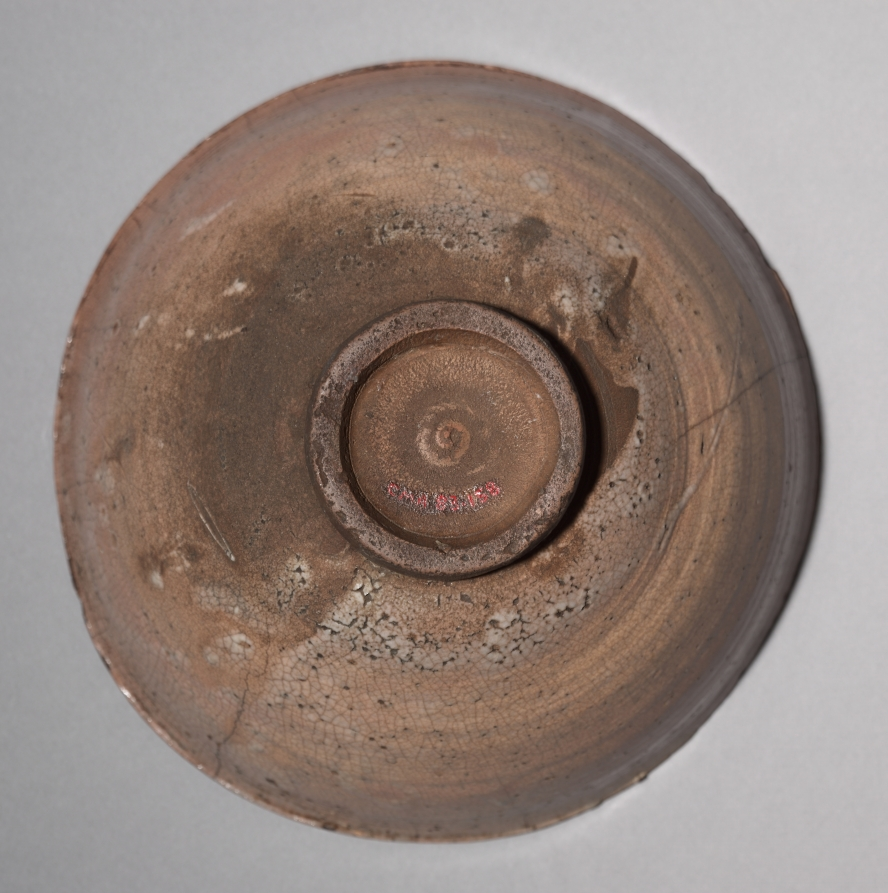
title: Tea Bowl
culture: Japan, Momoyama period (1573–1615)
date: c. 1600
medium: Glazed stoneware (Karatsu ware)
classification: Ceramic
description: Wide-mouthed bowls were used for consuming whipped tea such as that imbibed during the tea ceremony. Karatsu ware like this was among the most prized of such tea bowls. The port city of Karatsu in Saga prefecture in Kyushu was known for its kilns that produced high-fired, Korean-style glazed pottery. The Japanese ruler Toyotomi Hideyoshi invaded Korea in 1592 and 1597, returning with families of Korean potters as spoils of war. This region was one of the sites where these potters were resettled.